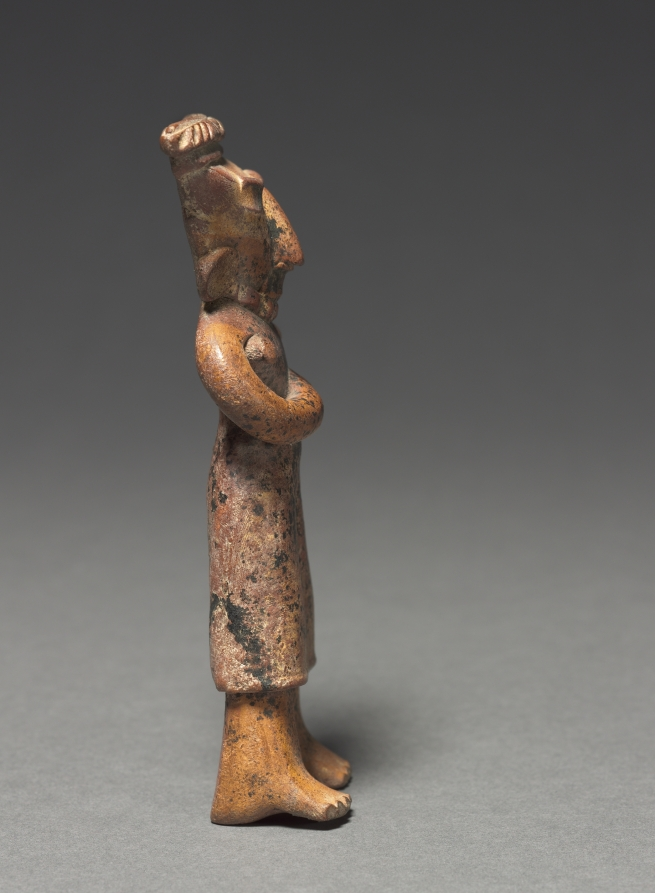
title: Female Figurine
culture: Mexico, Michoacán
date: 100 BCE–300 CE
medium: earthenware with pigment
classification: Sculpture